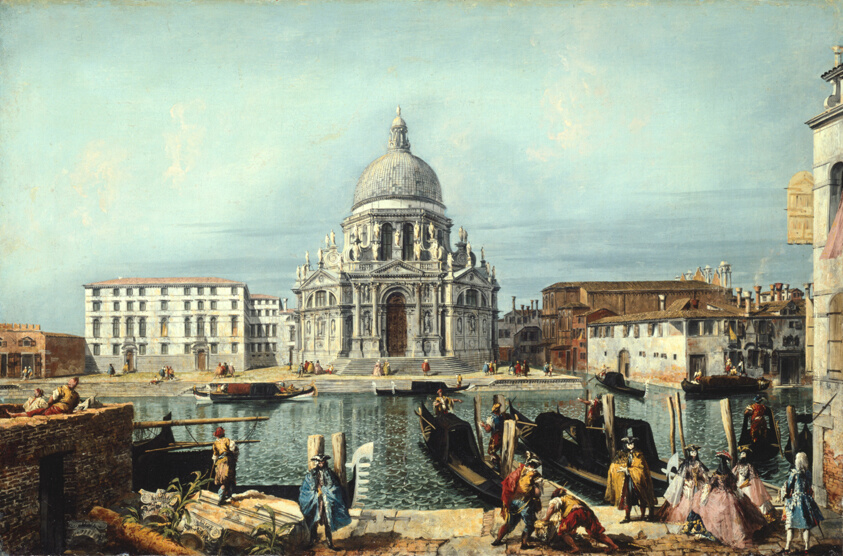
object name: Painting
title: The Church of Santa Maria della Salute, Venice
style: 18th Century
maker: Michele Marieschi (Italian, 1710–1743)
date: 1740/41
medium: Oil on canvas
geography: Italy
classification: oil on canvas; paint; oil paintings (visual works); Italian; painting; european painting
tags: cityscapes, city, cities, people, church, building, buildings, men, women, costume, fashion, water, Venice, Italy, Italy, boatman, boats, foliage, sky, figures, figure, smoke, window, doors